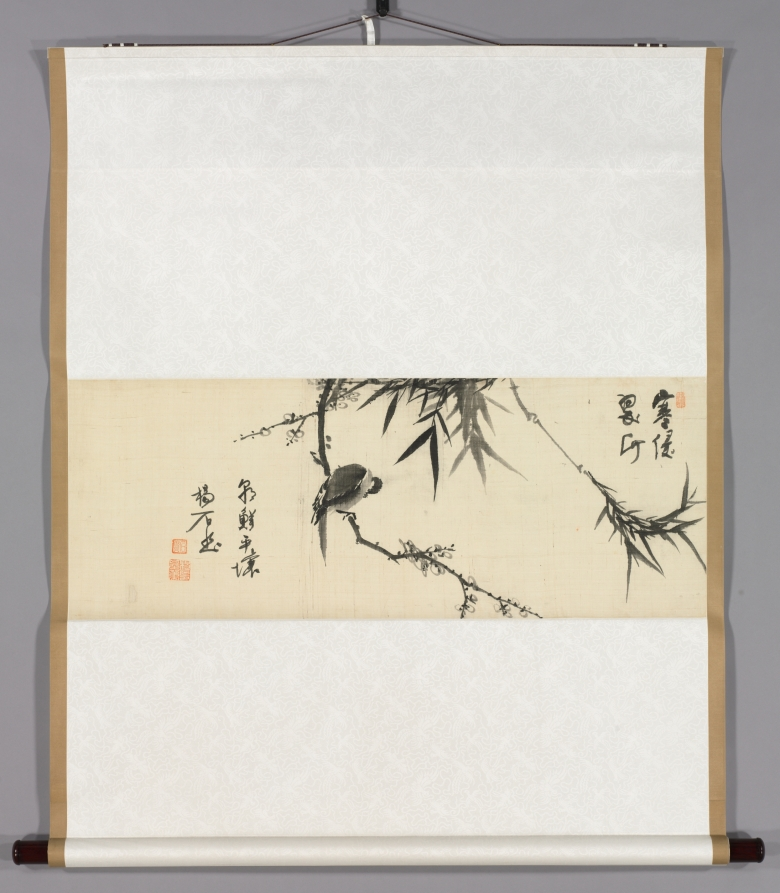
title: Bird Sleeping on a Plum Tree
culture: Korea, Joseon dynasty (1392–1910)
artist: Yang Ki-hun (Seuk-Eun) (Korean, 1843–1919?)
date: early 1900s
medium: hanging scroll, ink on silk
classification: Painting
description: The plum’s status as the orthodox symbol of the literati’s pure spirit originated in Lin Bu’s poem "Tiny Plum Flowers in Mountain Garden." The plum was also widely depicted in Korean paintings as part of the Four Gentlemen—or Four Gracious Plants—motif. Here, the plum and bamboo express literati spirituality while the bird with its head pointing downward indicates the artist’s feelings about the unstable situation at the end of the Joseon period. Yang Ki-hun was a Korean scholar-official renowned for painting and calligraphy. King Gojong (reigned 1863–1907) was one of Yang's prominent patrons.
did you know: Yang Ki-hun was one of the most commercially successful painters active in the late 19th century.